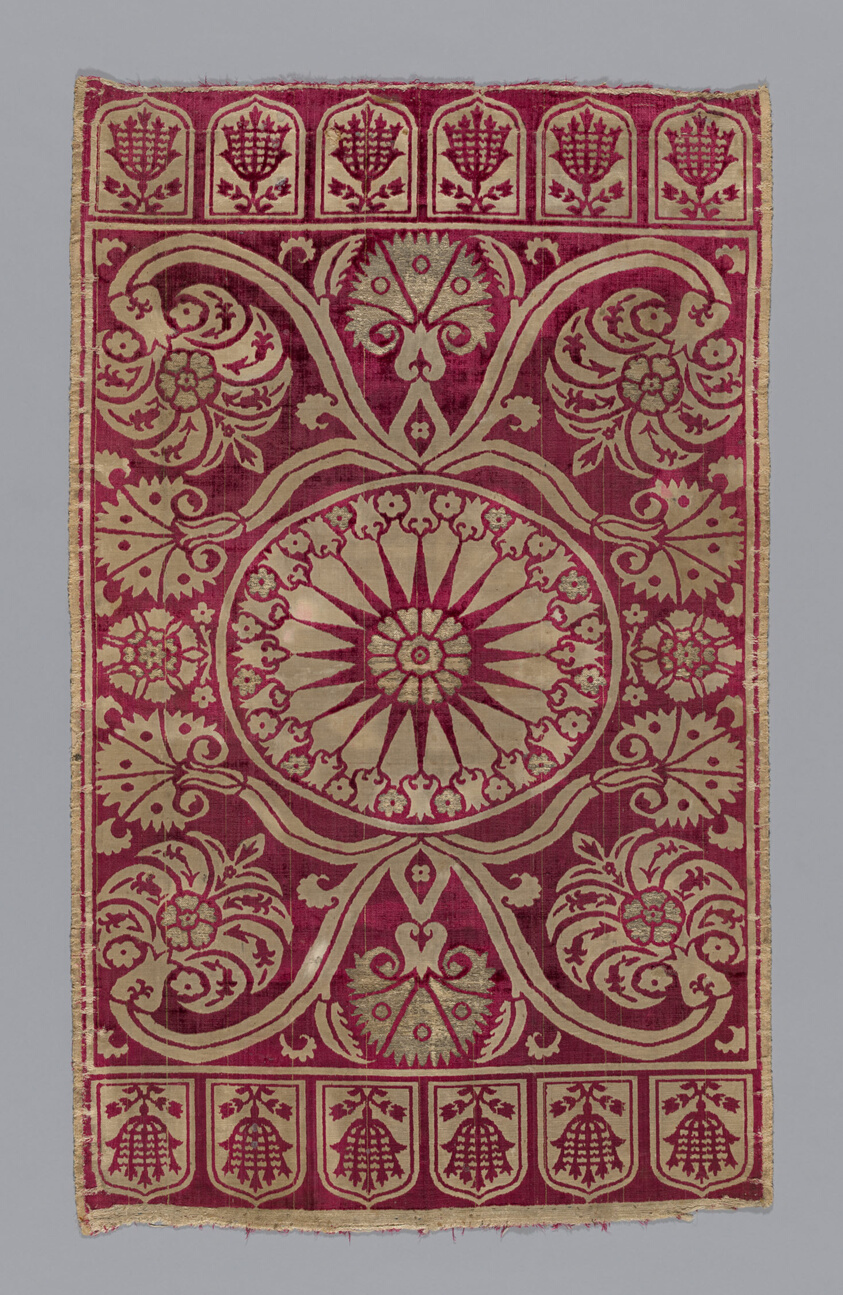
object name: Textile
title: Cushion cover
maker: Turkey, Bursa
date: 1601/25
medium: Silk, velvet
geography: Turkey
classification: textile; weaving - velvet